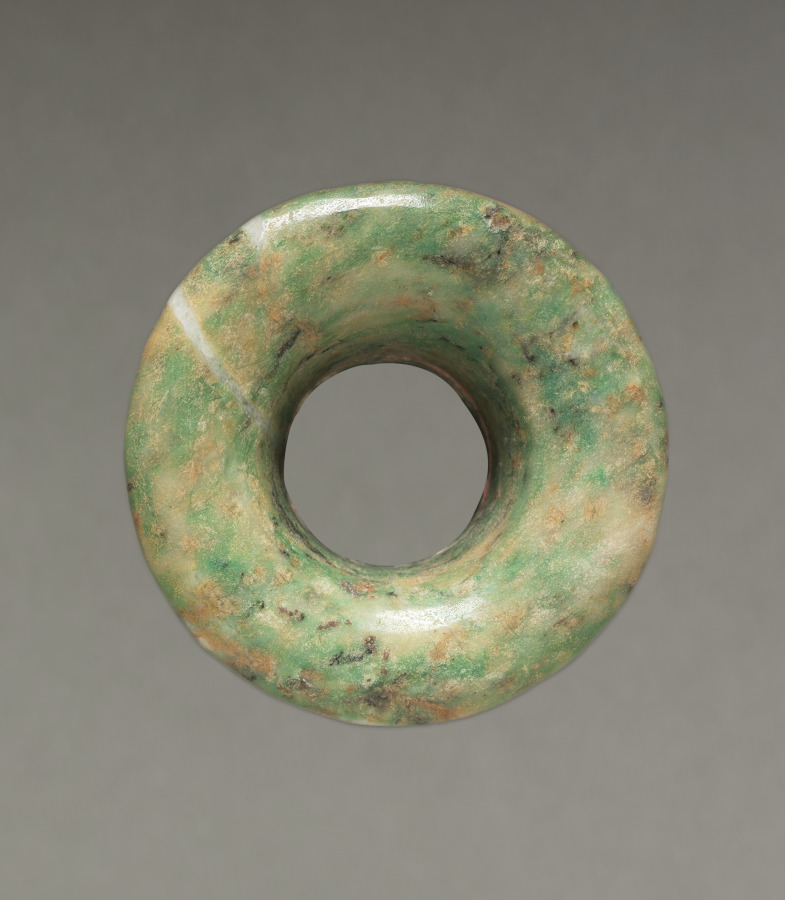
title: Ear Ornament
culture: Central Mexico, Teotihuacán style, Classic period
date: 150–200 CE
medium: jadeite-albitite(?)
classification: Sculpture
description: Near Teotihuacán's largest palace is a small temple gorgeously ornamented with green-feathered serpents, symbols of the earth's fertility. Beneath the temple lie at least 120 human sacrifices, most men, many warriors, and some wearing greenstone ornaments like these, perhaps a set. The sacrifices, apparently laid out to mark the cardinal directions, may have consecrated the temple or a ruler's tomb, or both.